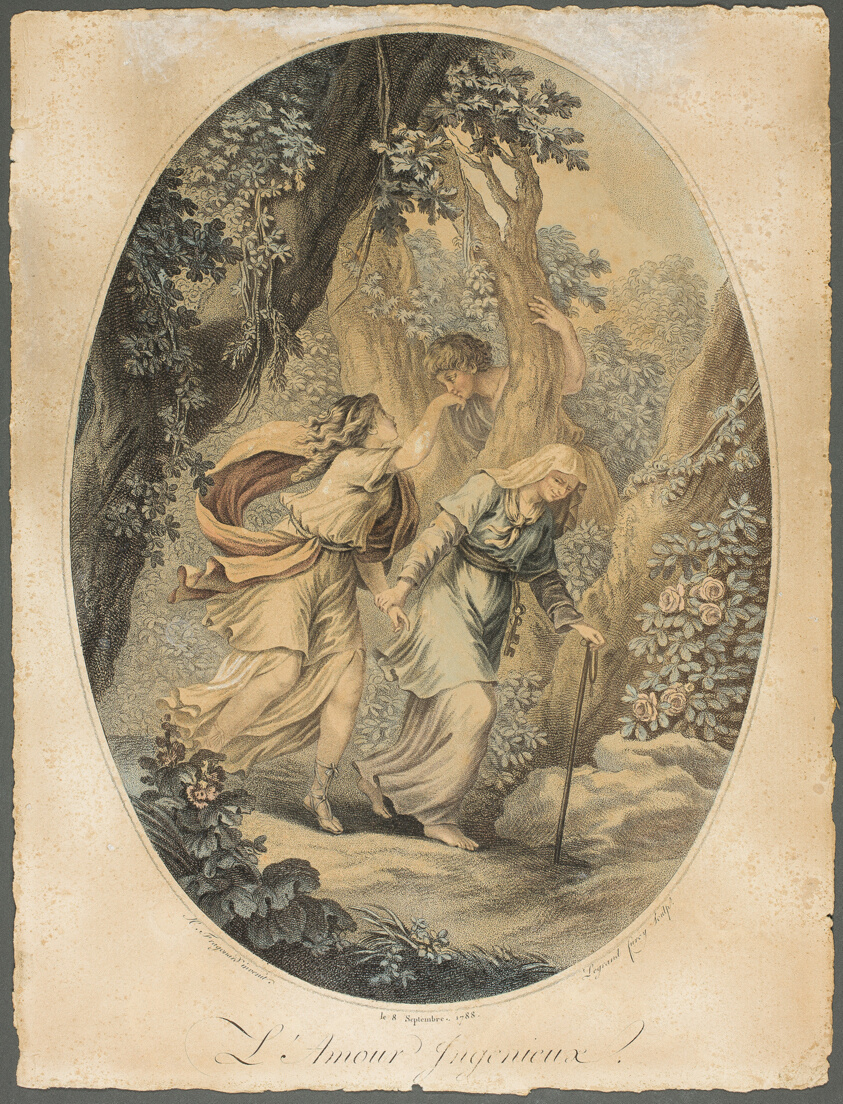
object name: Print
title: The Ingenious Love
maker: Jacques Guillaume Legrand (French, 1743-1808); after Jean-Honoré Fragonard (French, 1732-1806)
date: 1788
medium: Engraving with roulette on cream laid paper (discolored to tan)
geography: France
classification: engraving; paper; print; prints and drawing